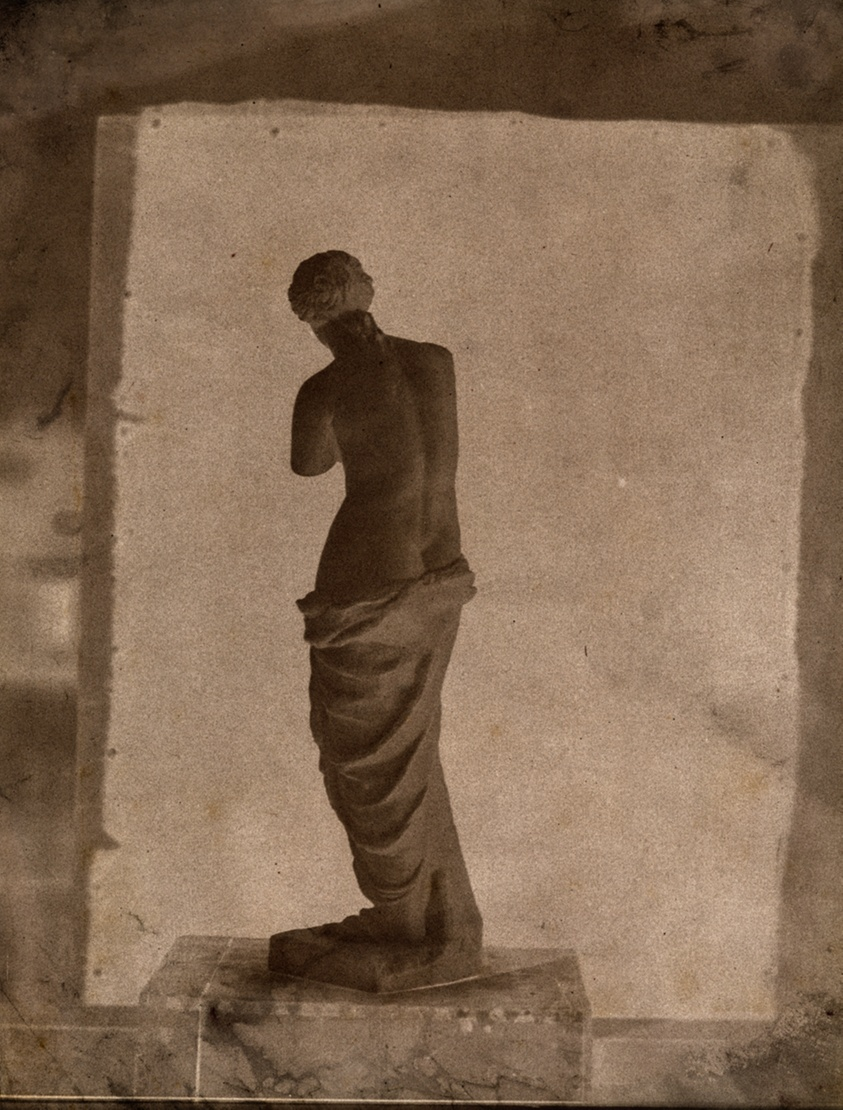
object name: Photograph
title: Untitled (Still life with a statuette of the Venus de Milo)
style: 19th century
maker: John Beasley Greene (American, born France, 1832–1856)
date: 1852-53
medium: Waxed paper negative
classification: photography; photograph; photographic process; black-and-white photography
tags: sculptures